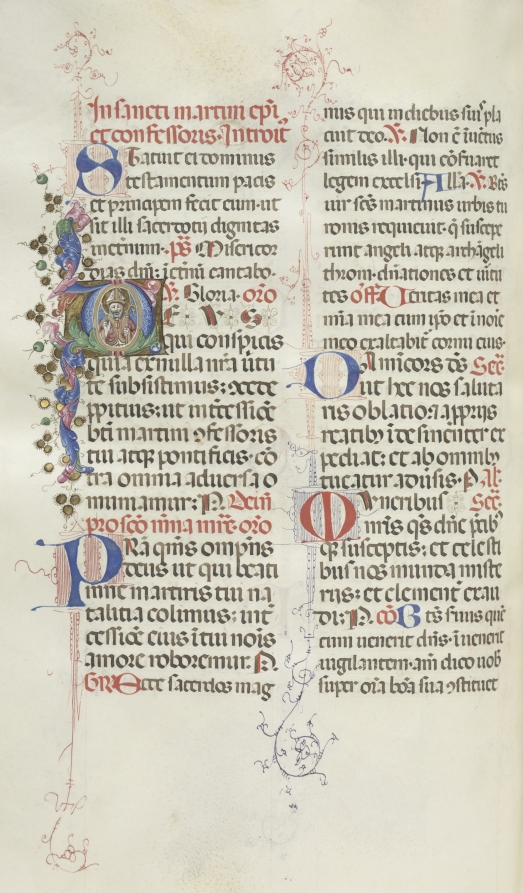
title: Missale: Fol. 324v: Saint Martin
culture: Italy, Perugia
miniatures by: Bartolommeo Caporali (Italian, c. 1420–1503)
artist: assisted by Giapeco Caporali (Italian, d. 1478)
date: 1469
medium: ink, tempera and burnished gold on vellum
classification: Bound Volume